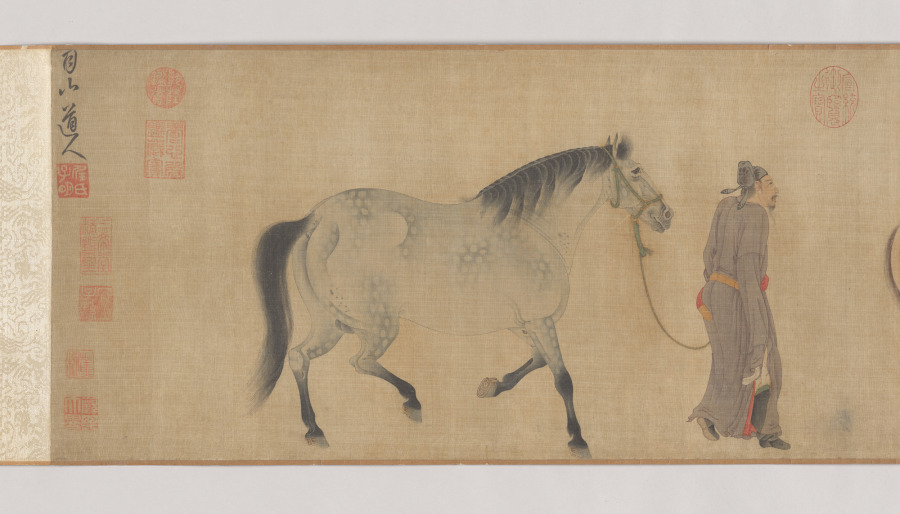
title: Three Horses and Four Grooms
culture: China, Yuan dynasty (1271-1368)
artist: Ren Renfa (Chinese, 1254–1328)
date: c. 1320s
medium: handscroll, ink and color on silk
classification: Painting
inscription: 月山道人. [印] 任氏子明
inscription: 1 colophon and 16 additional seals: 1 poem, 1 colophon dated 1552 or 1612, and 3 seals of Wang Yiying 王一瀛 (1500s); 2 seals of Liang Qingbiao 梁清標 (1620-1691); 6 seals of the Qianlong 乾隆 Emperor (r. 1736-95); 3 seals of the Jiaqing 嘉慶 Emperor (r. 1796-1821); 1 seal of the Xuantong 宣統 Emperor (r. 1908-12); 1 seal of Yu Xiezhong 余協中 (1900s).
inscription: Poem and colophon by Wang Yiying 王一瀛 (1500s): As for painters of horses in the previous dynasty, Surely the name of Yueshan [Ren Renfa] must come first. Under his brush and on his silk, They seem to have just galloped out from the imperial stud. Now as the world overflows with inferiority, Who, from the stable, can recognize a dragon-horse amidst mediocrity. Ren Yueshan [Ren Renfa] of the Yuan Dynasty was best in horse paintings. The three fine steeds he painted in this scroll are so dashing, so vigorous in spirit that they have indeed grasped some of the "brush-idea" of Han Gan. Not long ago this painting came into the possession of Mr. Gui Shanquan, who asked for my inscription. And I, while reading the old manuscripts of Hengshan [Wen Zhengming, 1470-1559], by accident, came cross the poem quoted above. As the ancients said "in painting horses, Master Han was [inspired by and produced] real horses; in composing poems, Master Su [Su Dongpo, the leading Song poet] wrote as if a painting were before him." These are truly what should be considered the two excellences; indeed, they are to be treasured. In the sixth month of the renzi year [either 1552 or 1612]. Jian feng shan ren [The Mountain Dweller of the Sword Peak], Wang Yiying, written in the Qu si ting Pavilion at Chiyang.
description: Ren Renfa's horse images are elegant in appearance and vigorous in spirit. His work attracted not only Chinese scholars but also the Mongols at the imperial court. Inspired by the contemporary scholarly interest in restoring a sense of antiquity in art—an artistic direction led by Zhao Mengfu that exerted a great impact in the Yuan art scene—Ren Renfa, like Zhao Mengfu, modeled his depictions of horses after the Song master Li Gonglin. Another key style component that Ren introduced to this genre was a revival of the Tang classical tradition. The refined color treatment of the horses as seen here was derived from the Tang master Han Gan.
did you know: Only the elegant first horse with a white blaze is accompanied by two grooms, as if its lightning speed required extra supervision.